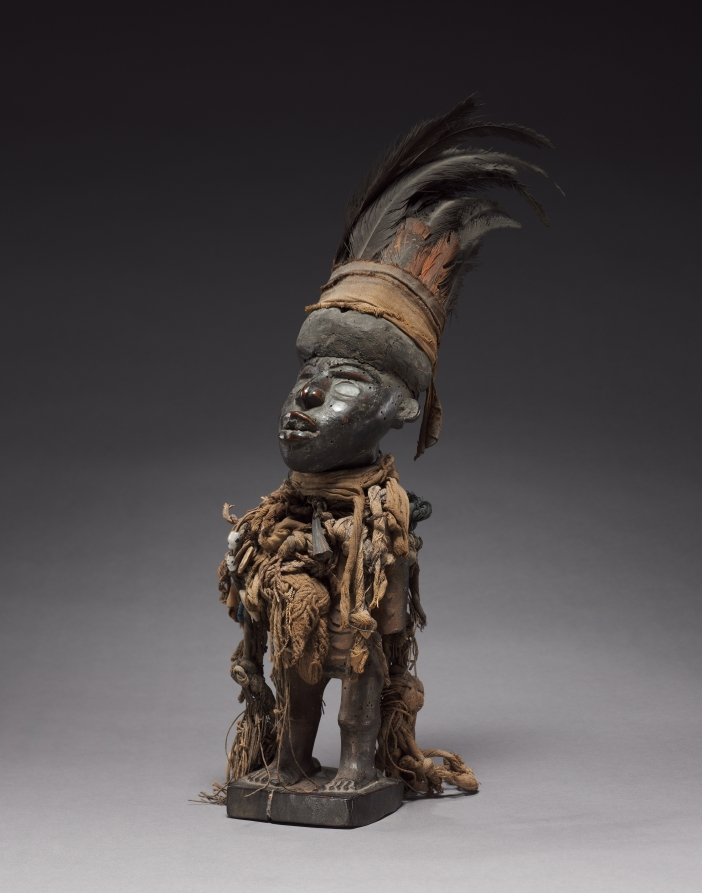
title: Male Figure (Nkisi)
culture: Africa, Central Africa, Democratic Republic of Congo, Cabinda, or Republic of the Congo, probably Vili-style maker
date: late 1800s-early 1900s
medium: Wood, cloth, resin, organic material, feathers, natural fibers, antelope horn, seashells (including cowrie shells), glass beads, metalized glass, and plant fiber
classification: Sculpture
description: Nkisi is an object that is believed to host an ancestral spirit. Unusual among these figures, this nkisi figure is missing its nduda, “night guns.” These guns would be filled with gunpowder functioning as defense against witches or misfortune. Unless its guns were lost during the course of its life history, this nkisi may instead be an example of a more general type called mpanzu, whose functions included protection.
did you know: Different from other figures functioning as defense against witches or misfortune, its “night guns,” or nduda, are missing.